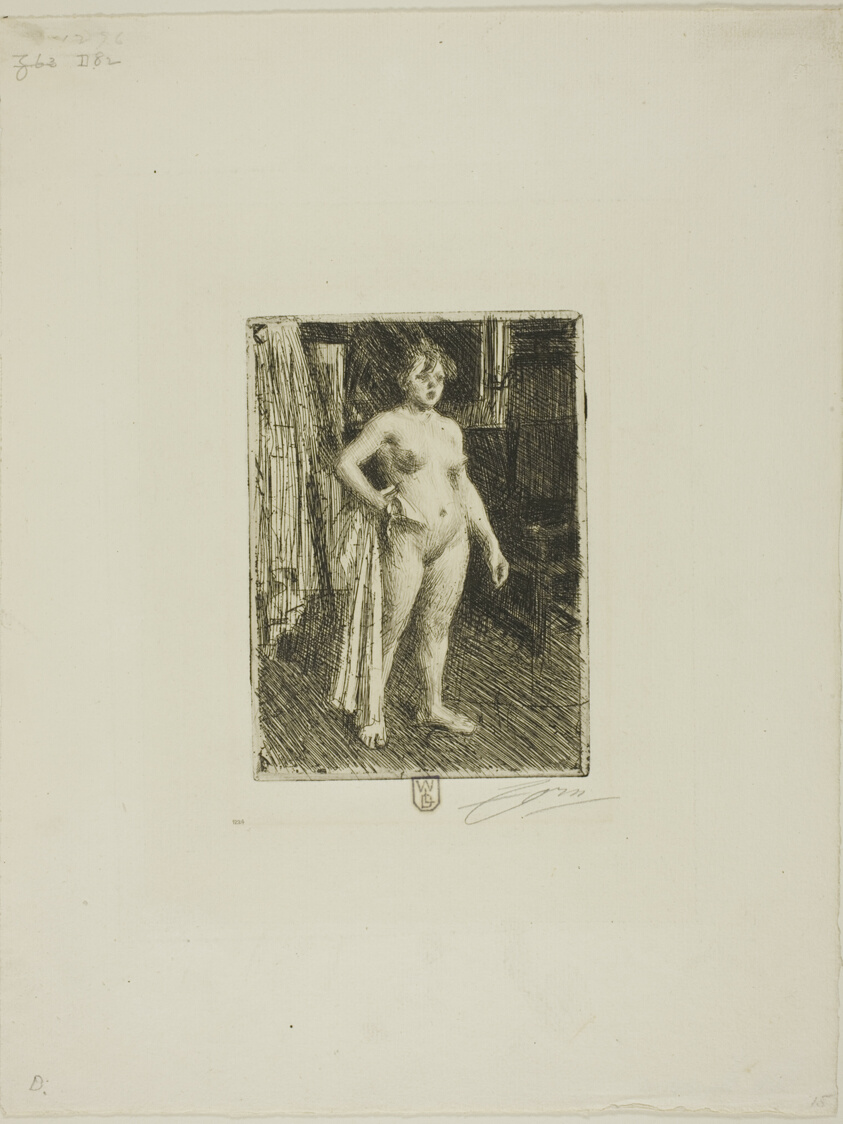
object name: Print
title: Venus de la Villette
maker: Anders Zorn (Swedish, 1860-1920)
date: 1893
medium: Etching on ivory laid paper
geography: Sweden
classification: etching; print; prints and drawing